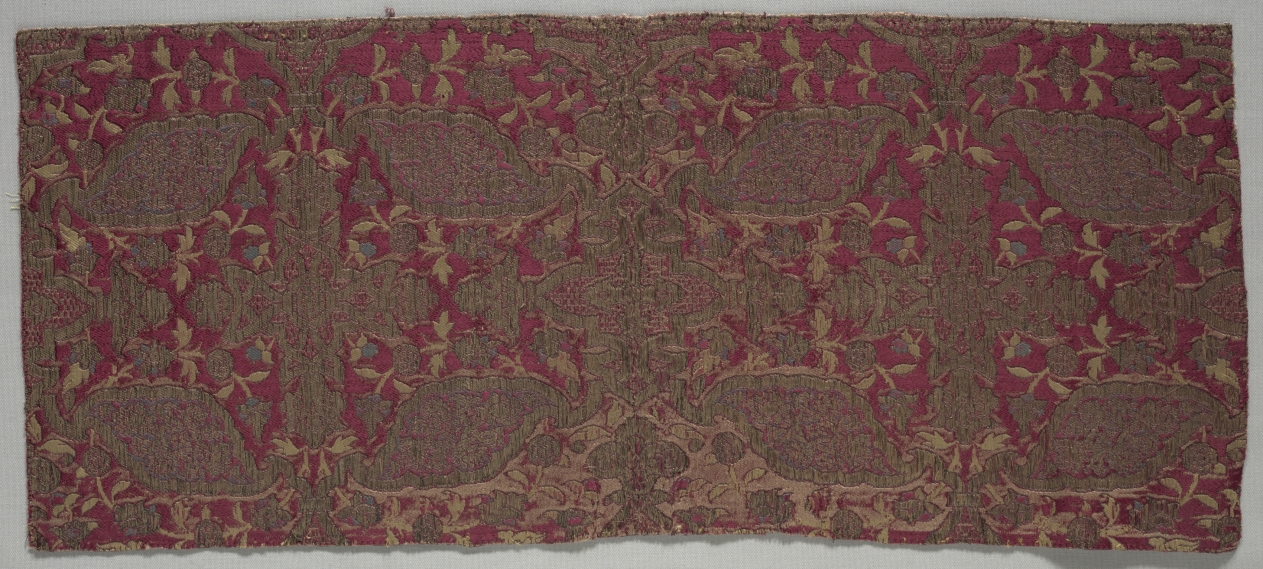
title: Brocaded Satin Textile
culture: Italy, 16th century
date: 16th century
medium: brocade; silk and metal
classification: Textile